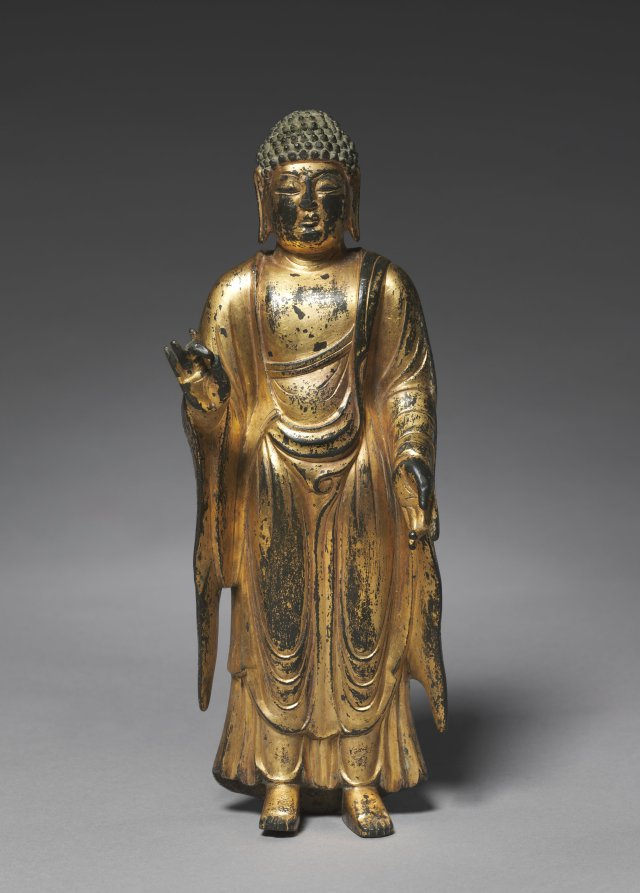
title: Standing Amitabha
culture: Korea, Unified Silla period (676-935)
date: 800s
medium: gilt bronze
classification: Sculpture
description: Buddhist teachings emphasize the pursuit of spirituality, rather than physicality, to achieve enlightenment. This statue’s artist, however, made genuine efforts to represent the divine’s beautiful voluminous body. Inspired by Indian Gupta period art (300s–500s CE), this particular artistic style emphasizing soft modeling and naturalism was further developed in China and flourished across East Asia.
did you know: This Korean statue has a stylistic affinity with statues from the Indian Gupta period (300s–500s CE) that emphasize soft modeling and naturalism.